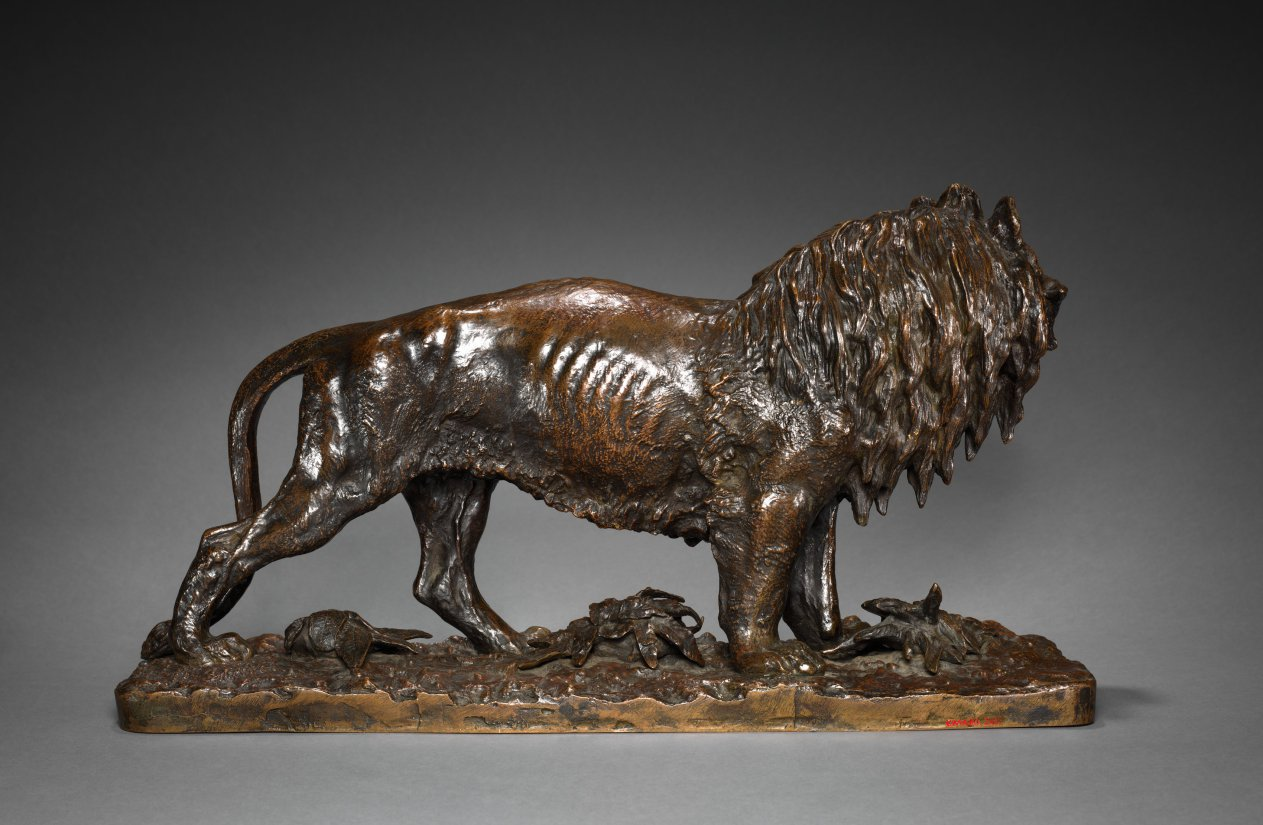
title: Standing Lion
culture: France, 19th century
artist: Christophe Fratin (French, 1801–1864)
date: c. 1837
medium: bronze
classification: Sculpture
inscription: Signed near clump of foliage beneath lion: "Fratin"